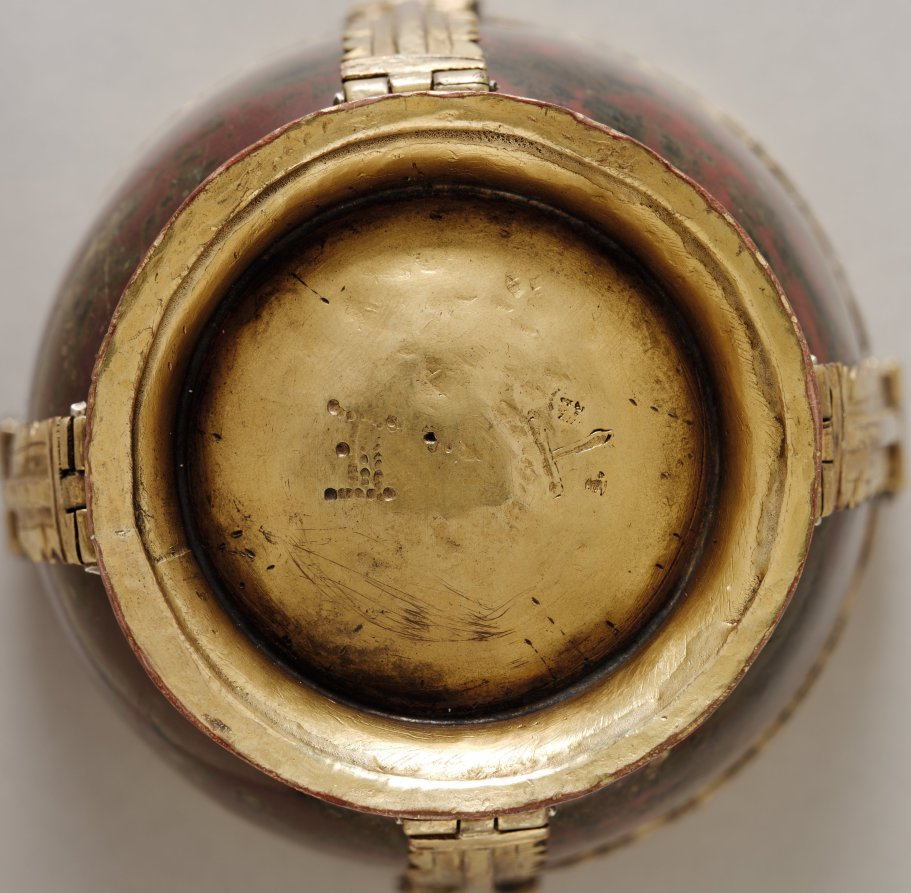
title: Calyx (Chalice)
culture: Byzantium, Middle Byzantine (843-1261)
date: 900s-1000s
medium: blood jasper (heliotrope) with gilt-copper mounts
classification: Glyptic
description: This hardstone vessel is shaped as a small bowl-shaped beaker which tapers slightly towards the base. It is crafted from jasper, a form of chalcedony, an opaque hardstone. The stone appears in a variety of colors, but in this instance is of the type known as "blood jasper," which assumes a deep ruby red color. The surface is highly polished and the vessel in enclosed in handsome gilt-copper mounts featuring a repeating lambrequin-type ornament. The calyx belongs to an exclusive and rare genre of object known today through about 30 surviving examples, most of which are preserved in the Treasury of San Marco in Venice. Because of its deep red color, blood jasper was highly prized by the Byzantines who saw it as a symbol of the blood of Christ. The original function of the vessel cannot be known with certainty. It may have assumed either a secular or liturgical function; however, the use of blood jasper would support the view that the calyx functioned as a liturgical chalice. Chalices in Byzantine Orthodoxy assumed multiple forms. Objects of this quality, materials, and execution are typically associated with circles of the Byzantine court. Such objects were often gifted to churches.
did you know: The Byzantines inherited their love of hardstones and their skill at carving them from the Romans.